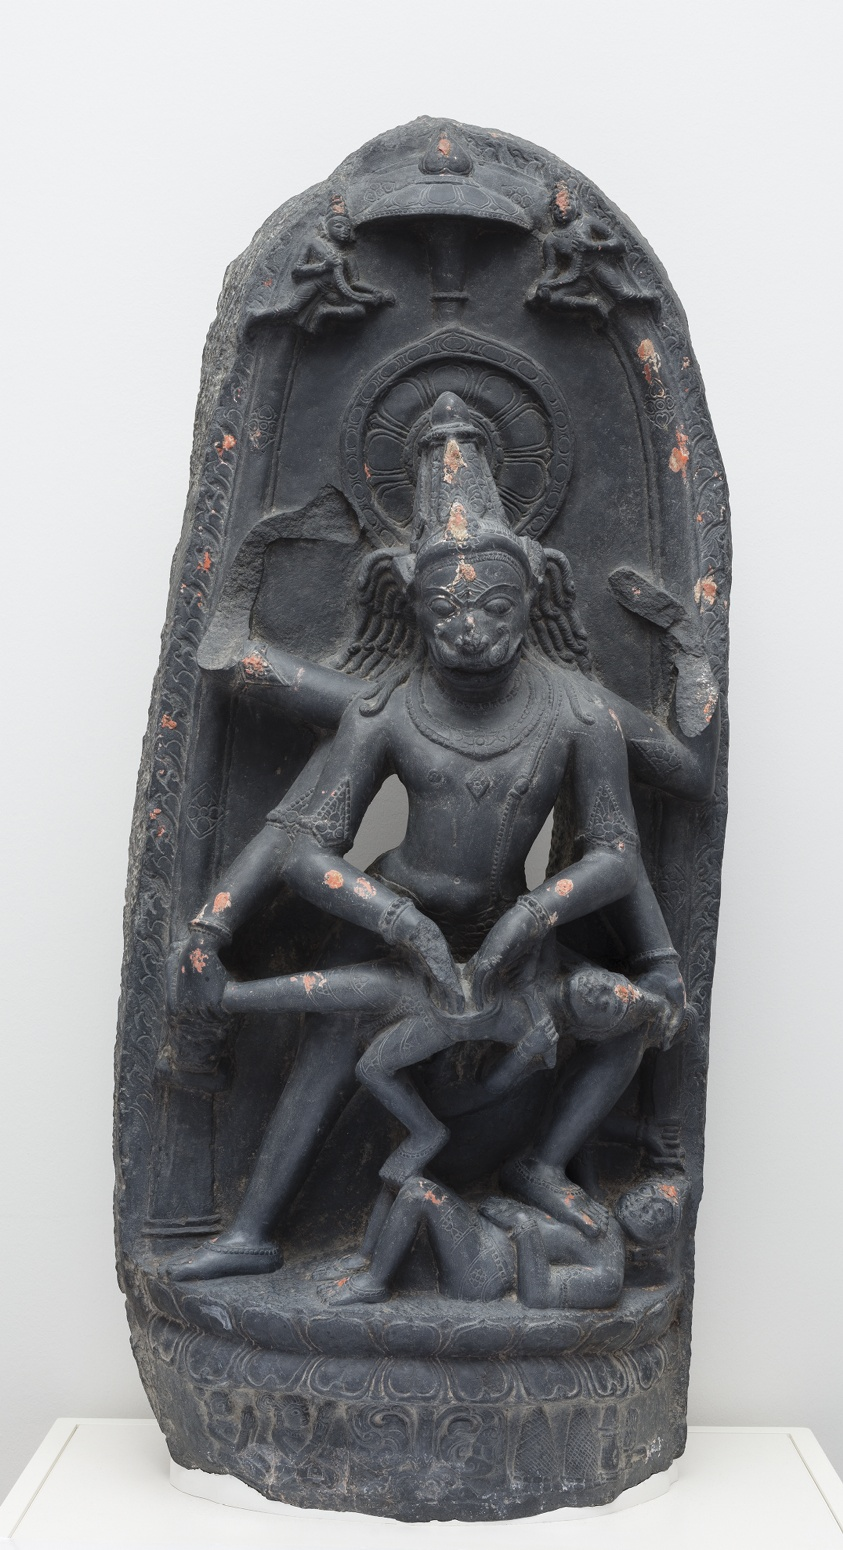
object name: Sculpture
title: Narasimha, Man-Lion Incarnation of God Vishnu Destroying the Demon Hiranyakashipu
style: South Asian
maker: Bangladesh or eastern India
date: Pala period, 11th century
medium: Basalt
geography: Bangladesh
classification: stone; sculpture; asian art